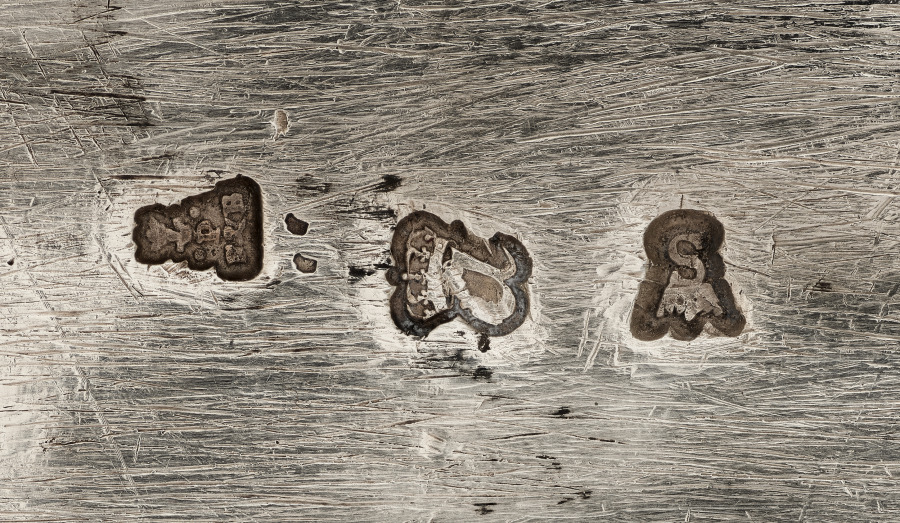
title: Tureen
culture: France, Paris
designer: Juste-Aurèle Meissonnier (French, 1695–1750)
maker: Pierre-François Bonnestrenne (French)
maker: Henry Adnet (French, 1745)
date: 1735–38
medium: silver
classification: Silver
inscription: engraved Meissonnier signature.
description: See entry for cover record 1977.182.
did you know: The langoustine, pigeon, and vegetables were cast using real examples giving the silver copies lifelike detail and appearance.